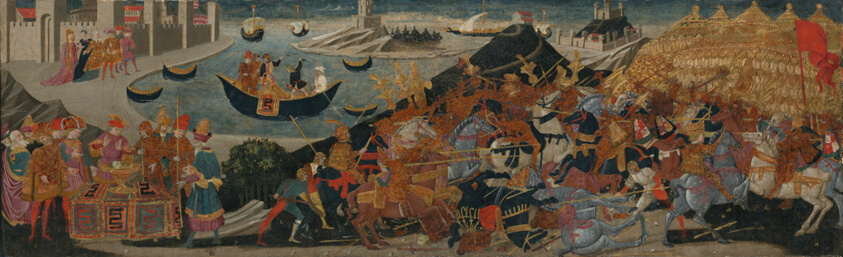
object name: Painting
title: The Battle of Pharsalus and the Death of Pompey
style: 15th century, Renaissance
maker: Workshop of Apollonio di Giovanni (Italian, 1415/17-1465); Marco del Buono Giamberti (Italian, 1403-1489)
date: c. 1455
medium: Tempera on panel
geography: Italy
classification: tempera; paint; painting; european painting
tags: battles, Roman, classical, horses, horse, violence, death, soldiers, boats, water, history, historical figures